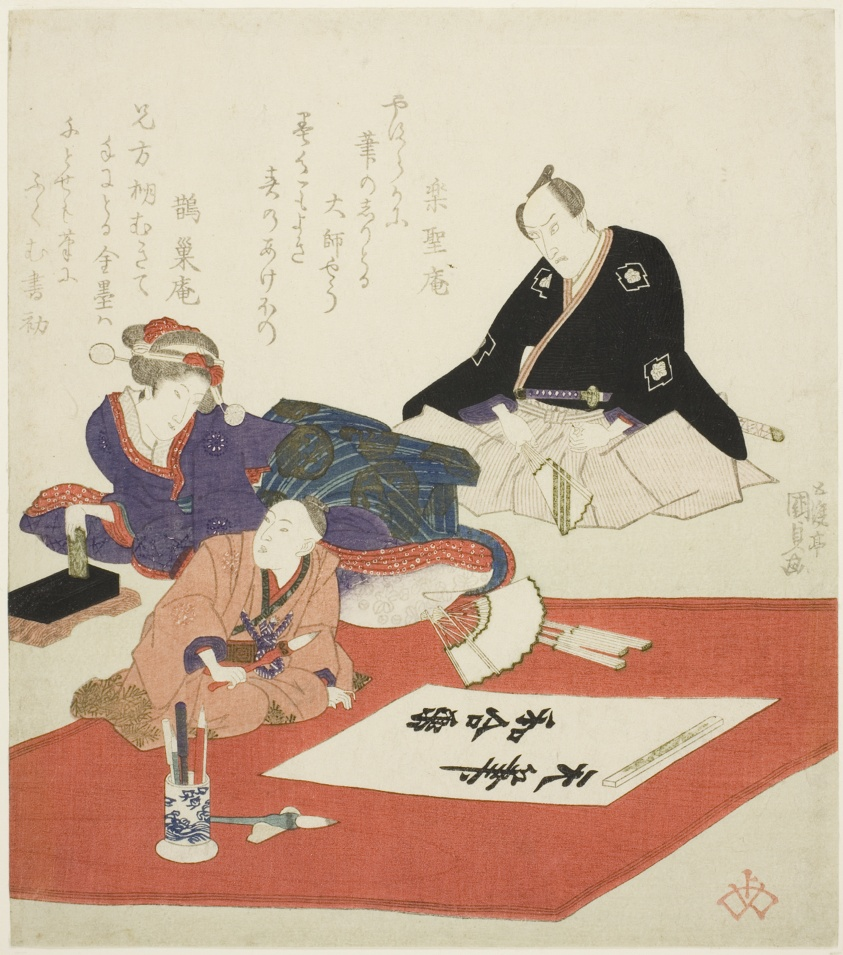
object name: Print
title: The actor Ichikawa Dajuro VII and a woman watching boy write first calligraphy of the New Year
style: Japanese (culture or style)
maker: Utagawa Kunisada; Japanese, 1786-1864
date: 1831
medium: Color woodblock print; shikishiban, surimono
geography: Japan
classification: woodblock print; print; asian art